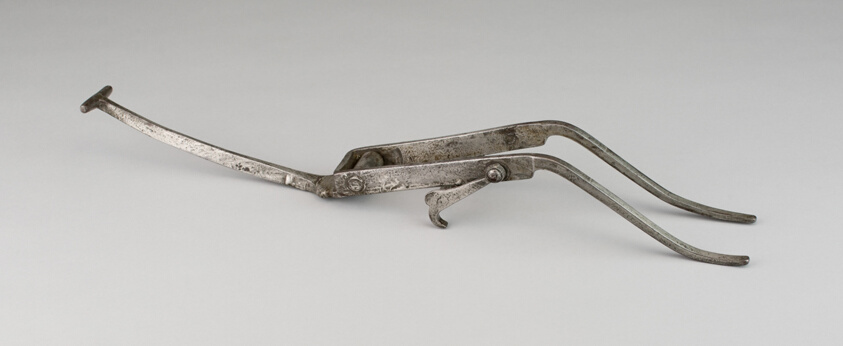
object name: Arms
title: Goat's Foot Lever for a Crossbow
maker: Spanish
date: early 16th century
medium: Iron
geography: Europe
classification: crossbow; arms; arms and armor